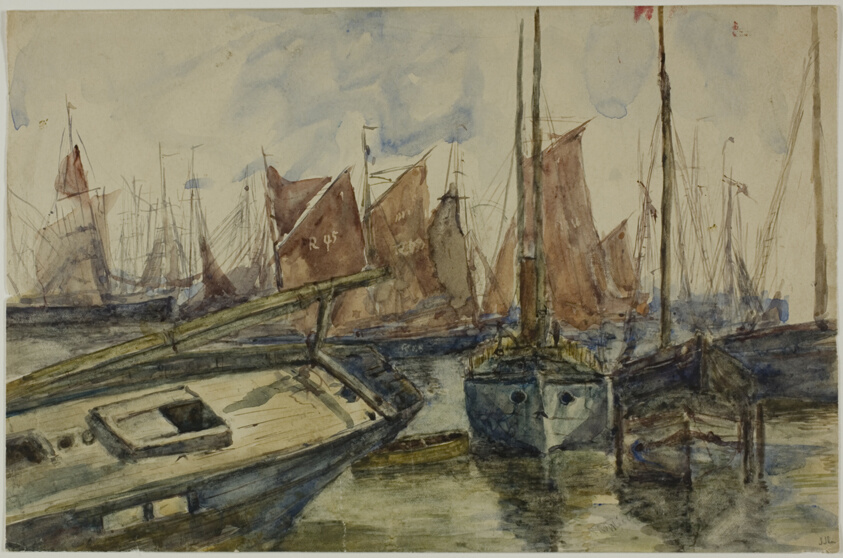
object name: Drawing and Watercolor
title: Ships in Port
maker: Unknown Artist; American or English, 19th century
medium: Watercolor over traces of graphite on ivory wove paper, laid down on tan wove paper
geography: United States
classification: watercolor; drawings (visual works); prints and drawing